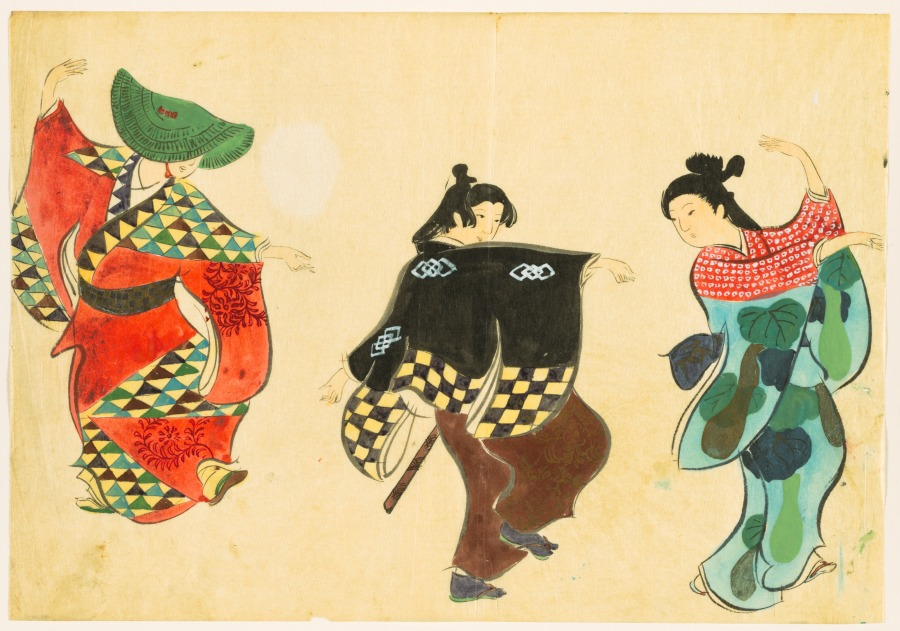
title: Flowers of a Hundred Worlds (Momoyogusa): Dancing (Odori)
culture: Japan, Meiji period (1868–1912)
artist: Kamisaka Sekka (Japanese, 1866–1942)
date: 1909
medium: ink and color on paper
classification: Drawing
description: Kamisaka Sekka made preparatory drawings for his Flowers of a Hundred Worlds series on tracing paper with ink and color. The freehand sketches are much looser than the finished, printed compositions.